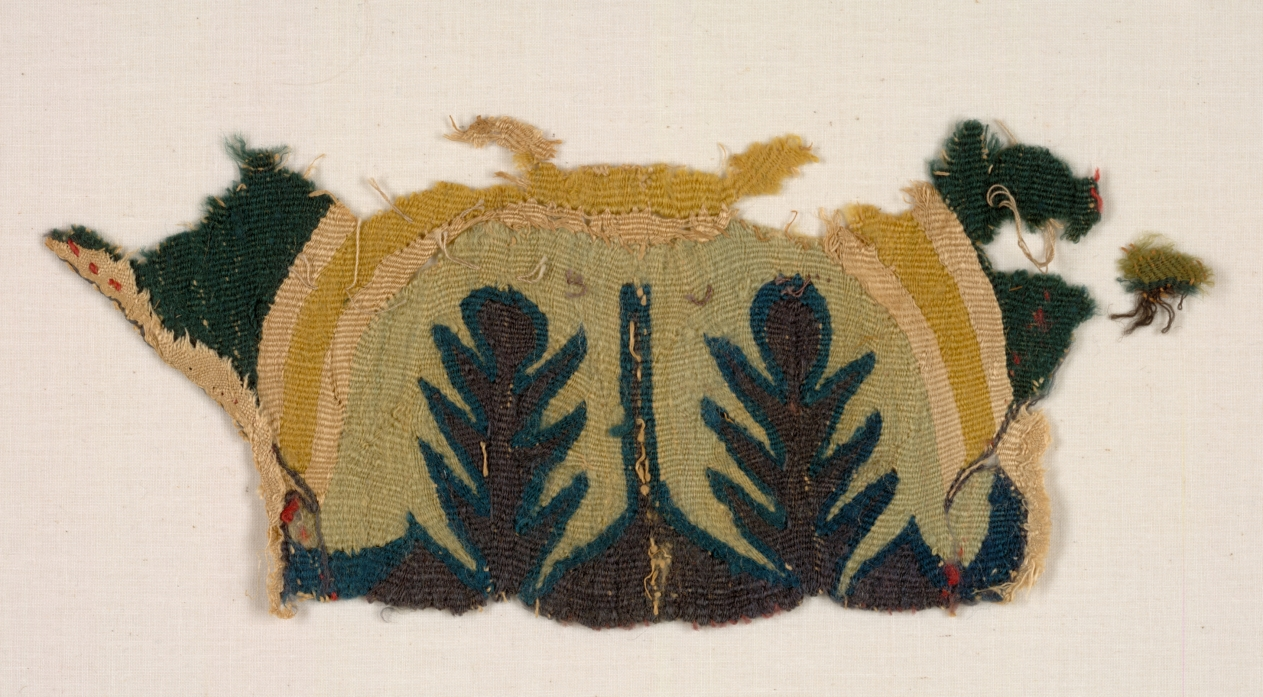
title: Fragment with Abstracted Leaves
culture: Egypt, Byzantine period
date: 500s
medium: tabby weave with inwoven tapestry ornament, linen and wool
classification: Textile